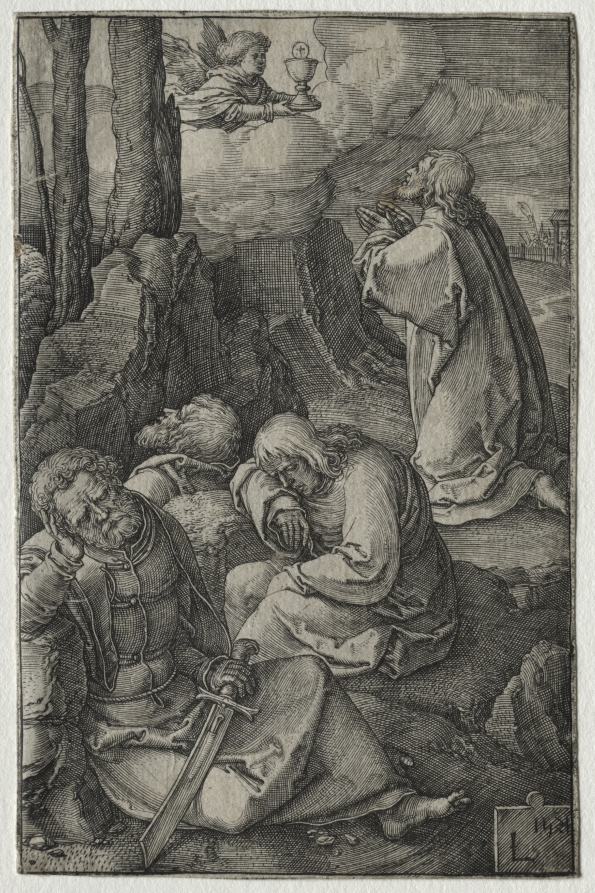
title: The Passion: The Agony in the Garden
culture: Netherlands, 16th century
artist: Lucas van Leyden (Netherlandish, 1494–about 1533)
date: 1521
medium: engraving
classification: Print